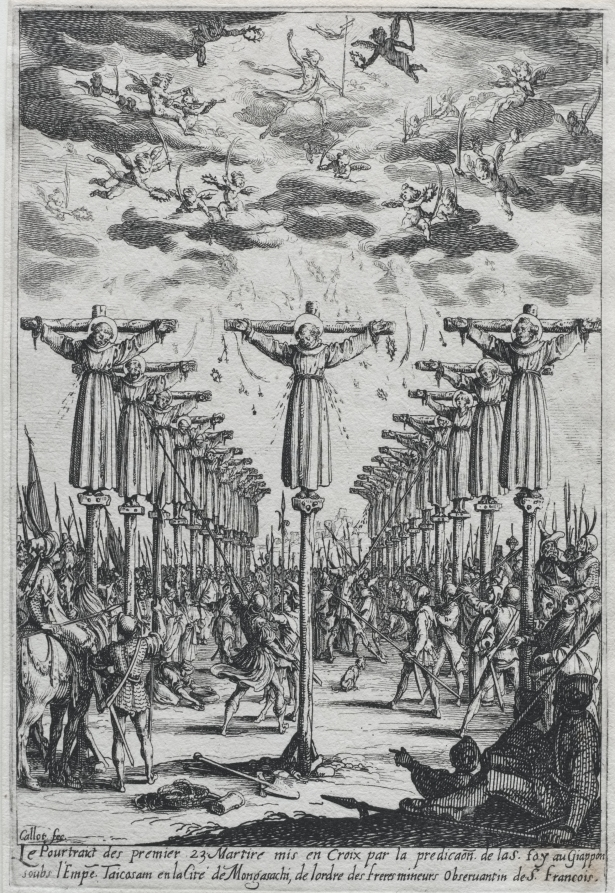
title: The Martyrs of Japan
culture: France, 17th century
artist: Jacques Callot (French, 1592–1635)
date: 1600s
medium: etching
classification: Print